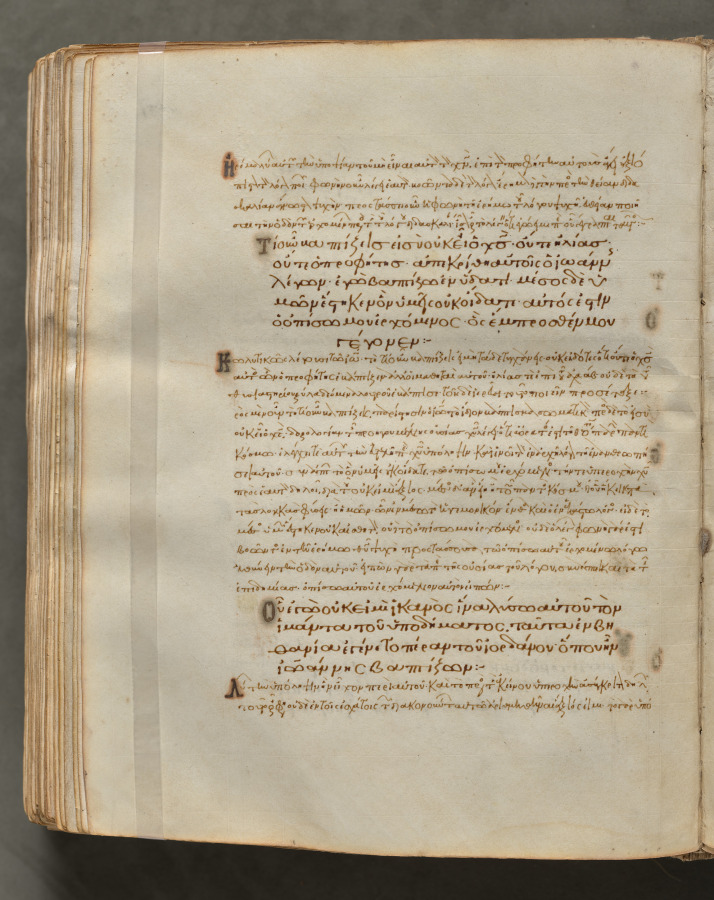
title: Text, folio 326 (verso), from a Gospel Book with Commentaries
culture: Byzantium, Constantinople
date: c. 1000–1100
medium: ink, tempera, and gold on vellum; leather binding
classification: Bound Volume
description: Each of the four gospels in this book opens on a page with brilliantly illuminated borders depicting the author of the text as well as birds—principally peacocks, symbols of the immortality of the soul—and fountains, representing the fountain of life and the salvation of the soul. This volume consists of 428 leaves with texts in Greek. Its level of sophistication suggests that it was probably written and decorated in a monastery in Constantinople.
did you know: Gospel books were carried in procession through Byzantine churches.